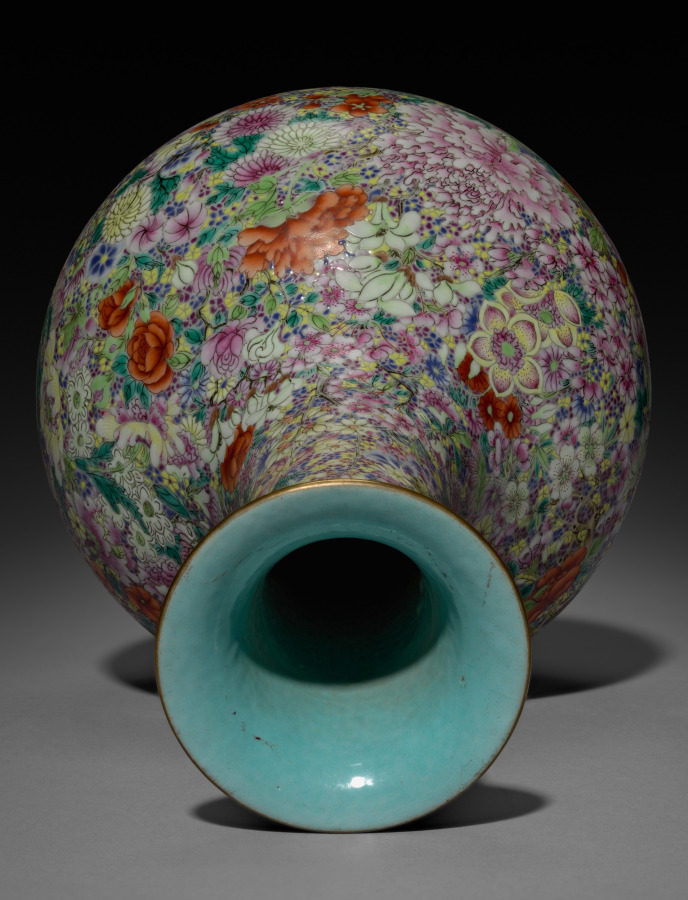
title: Bottle-Shaped Vase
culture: China, Qing dynasty (1644–1911), Jiaqing reign (1796–1820)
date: 1796–1820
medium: Porcelain, overglaze colors and gold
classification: Ceramic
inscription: 大清嘉慶年制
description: This vase is densely decorated with peonies, morning glories, lilies, and lotuses. Purple, yellow, and blue petals fill the surface, forming a continuous millefleur (thousand-flower) pattern. Each petal is delicately shaded to suggest volume and depth, creating a vivid yet orderly composition. The mouth is painted with gold pigment to imitate metal, evoking the appearance of copper-body-painted enamel as seen in Qing dynasty court art. Qing palace records indicate that vases with such patterns were used in everyday flower-viewing displays. In late Qing inventories, comparable examples were listed as furnishings for the emperor and his consorts.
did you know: Porcelain with this dense floral millefleurs decoration and a multitude of overglaze enamel colors was first made in the Qing dynasty and remained popular into the late 1800s.